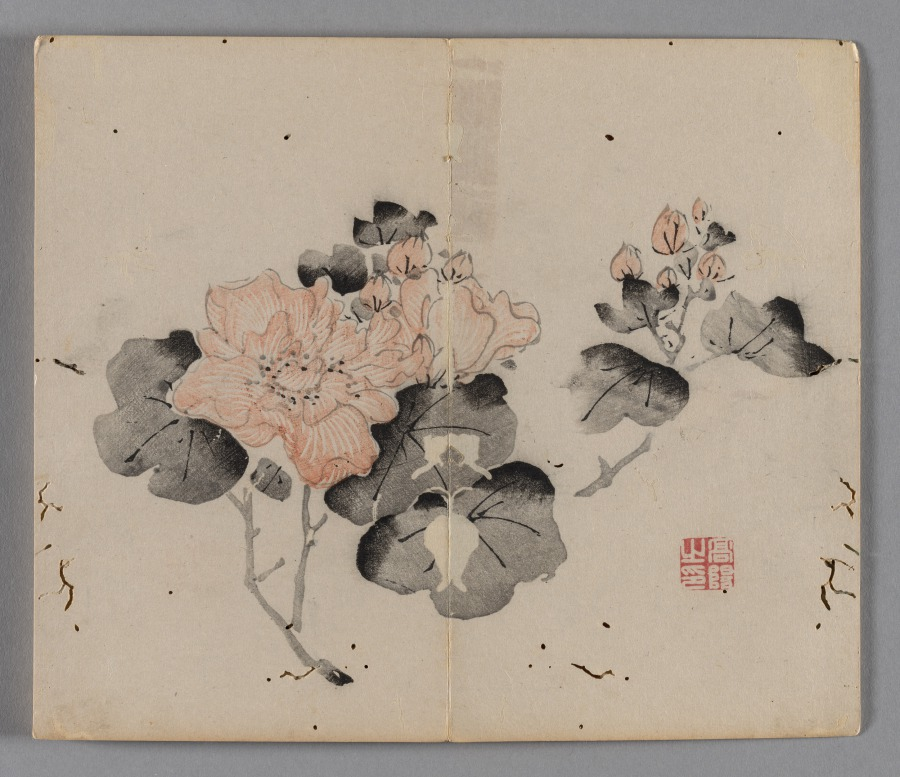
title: Ten Bamboo Studio Collection of Calligraphy and Painting: Miscellaneous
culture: China, Qing dynasty (1644-1911)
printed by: Hu Zhengyan (Chinese, c. 1584–1674)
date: 1633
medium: Woodblock-printed book; ink and colors on paper; first edition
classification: Print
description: Color printing reached a level of perfection in the early 1600s, as seen in this Ten Bamboo Studio Collection of Calligraphy and Painting and the Mustard Seed Garden Manual of Painting (printed 1679 and 1701). The painterly quality, precision in registering (aligning) the woodblocks, and harmonious colors made them the most successful color print editions in Chinese history. Both editions were printed and compiled in Nanjing, spread nationwide, and had a great impact on the arts in Japan and Korea.